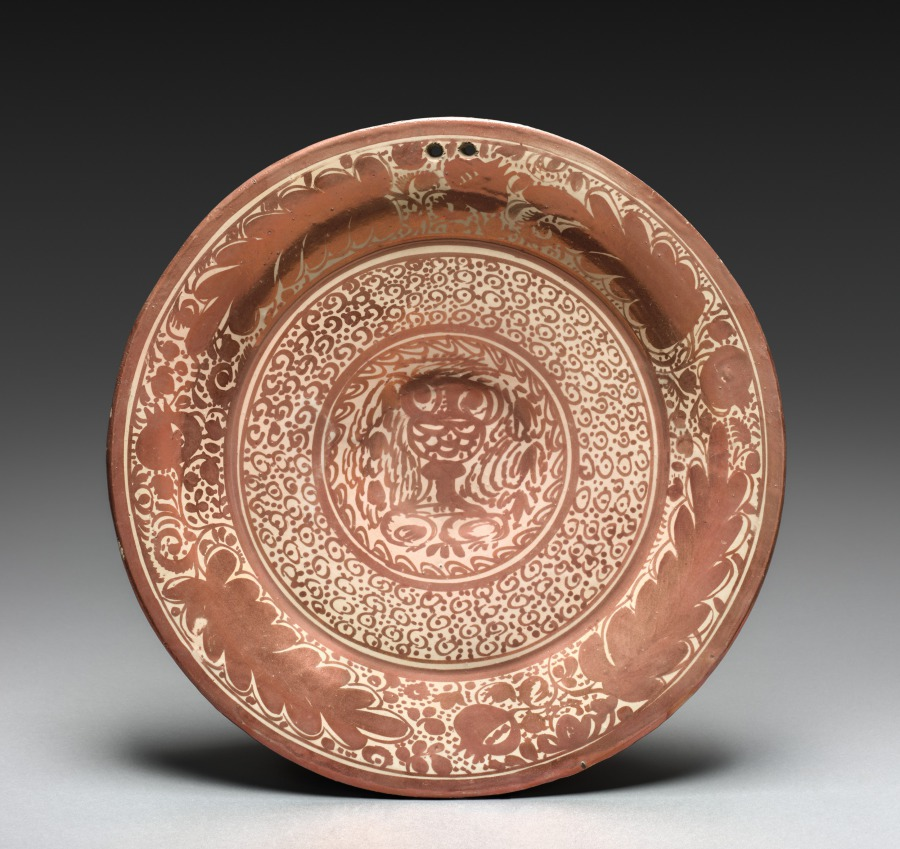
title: Dish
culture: Spain, probably Valencia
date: c. 1475–1500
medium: Tin-glazed earthenware with luster-painted design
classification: Ceramic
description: Alternating leaves and pomegranates circle the rim of this dish, emerging from the swirling vegetal motif in the background. The pomegranate is a common decorative element in Islamic art. It is mentioned in the Qur’an as one of the fruits of paradise and is prized for its beauty and nutritional benefits. The use of the pomegranate on this luminous dish may indicate that it was produced for the court of the Nasrid dynasty (1232–1492) in Spain. The palace of Alhambra, the seat of power for the emirs, dynastic Muslim rulers, from the early 1300s, is in Granada, which translates to pomegranate.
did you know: A wine cup in the center of the dish evokes the pleasures of a feast.